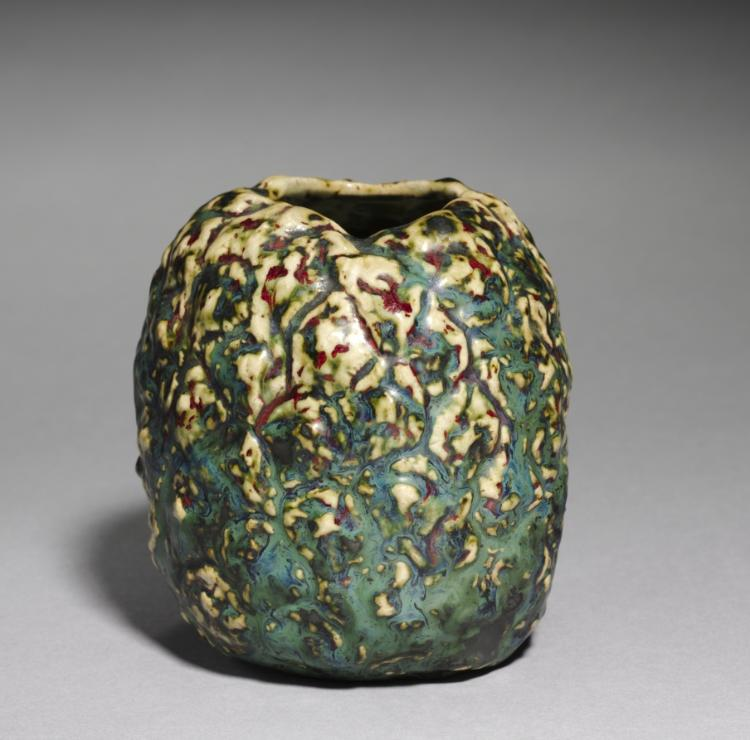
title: Vase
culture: France, early 20th Century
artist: Pierre Adrien Dalpayrat (French, 1844–1910)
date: c. 1900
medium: stoneware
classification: Ceramic